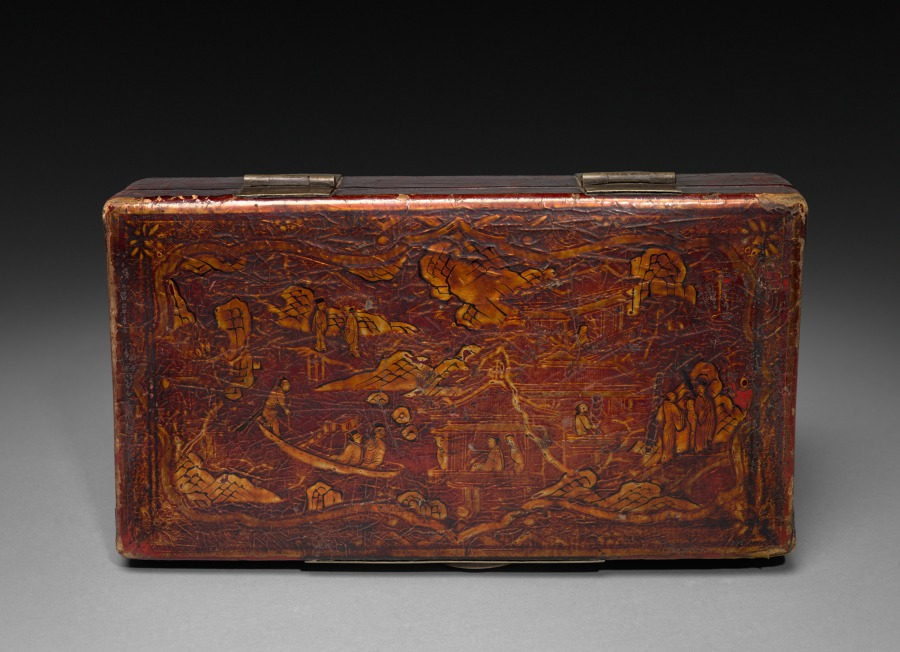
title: Box with Hinged Lid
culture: Japan, Edo period (1615–1868)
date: 1700s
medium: lacquer; metal hinges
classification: Lacquer